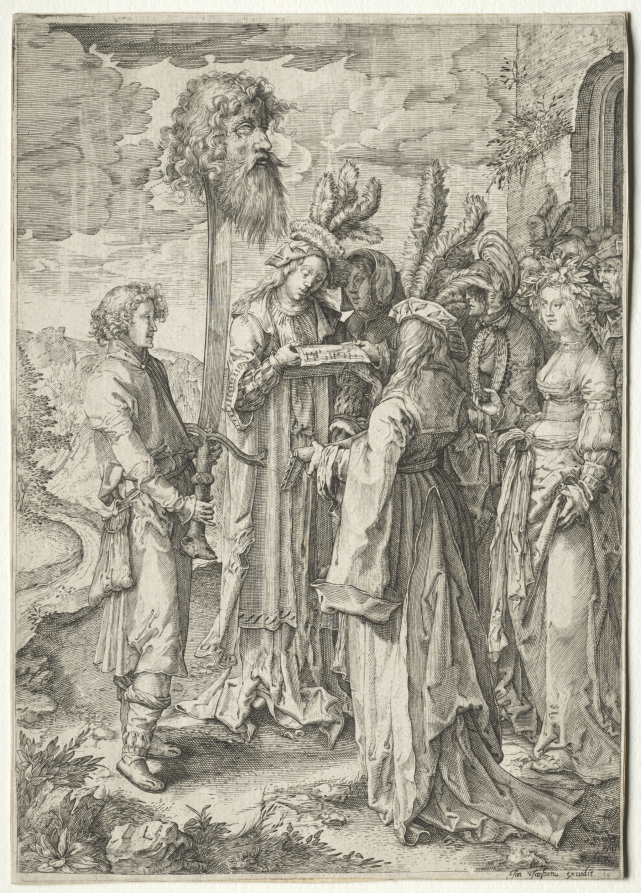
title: David with the Head of Goliath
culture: Netherlands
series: David with the Head of Goliath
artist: Pieter Serwouters (Flemish, 1586–1657)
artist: after Lucas van Leyden (Netherlandish, 1494–about 1533)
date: 1620s–30s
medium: engraving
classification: Print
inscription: Printed in lower right margin: "Jan Janssen excudit"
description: Here, a hymn of praise is sung to the victorious shepherd David, who holds the head of Goliath impaled on a large sword. The life of King David, as relayed in the Old Testament, was intrinsically linked with music. According to the first book of Chronicles, he initiated the use of music in divine worship in his capacity as the king.